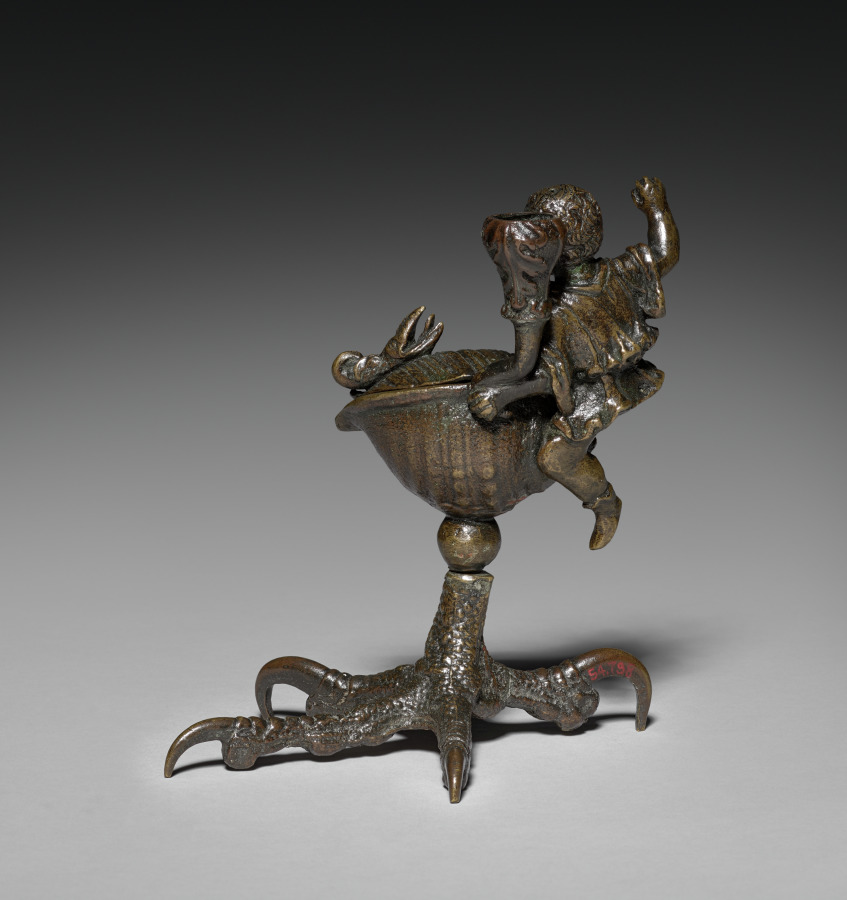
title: Inkwell and Candlestick with the Infant Hercules Killing the Serpents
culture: Italy, Ravenna, 16th century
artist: workshop of Severo da Ravenna (Italian, c.1496–c.1543)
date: c. 1510–20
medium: bronze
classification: Sculpture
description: In the early 1500s, Padua, a center of strong humanist traditions, encouraged the revival of classicism, and artists took their cues from descriptions in the works of classical authors. Classical small-scale bronzes grew in demand, and in response, the city's bourgeoning foundries produced a varied and extensive supply of small statues. Like many early Paduan bronzes, this work's utilitarian function—used to hold ink and to supply light—is complimented by its ornamental value. The base consists of an eagle claw, cast from life, supporting an equally realistic nautilus shell. Though medieval artists had occasionally used seashells to hold paints, the shell inkwell, whose small size makes it rather impractical to use, was a motif particular to Padua. Perched upon the shell is most likely Hercules, the son of Zeus. Perhaps aided by a staff (now missing) he is poised to strike a serpent, which according to myth was sent by Hera, the jealous wife of Zeus, to kill him. The dramatic opposition of hero and monster enhances the connection to the classical past, further meeting the desires of the educated patrons of Padua.